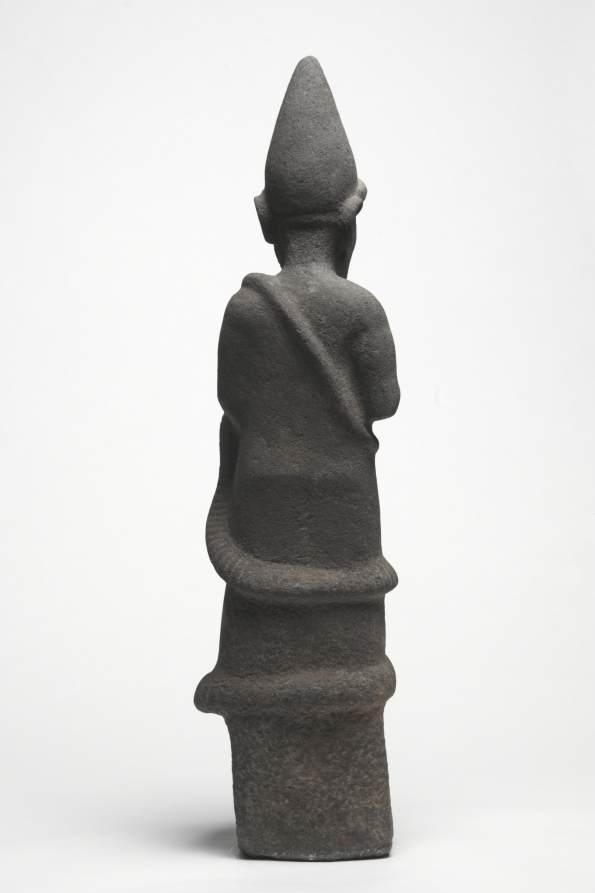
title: Priest-King or Deity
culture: Hittite, North Syria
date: c. 1600 BCE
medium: basalt with bone eyes (left, ancient; right, restored)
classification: Sculpture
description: The Hittites migrated into Anatolia in the 3rd millennium BCE and spoke an Indo-European language, a group that includes Greek, Latin, Persian, Sanskrit, English, and most modern European languages. They were the first ancient people to use iron for weapons. From about 1600–1200 BCE their empire was at its peak, extending from central Anatolia to Syria, and south along the eastern Mediterranean. Their vast empire and interest in commerce enabled the Hittites to spread Mesopotamian ideas and culture throughout the ancient Mediterranean world. This large basalt sculpture is exceptionally rare in depicting a Hittite god or priest-king wearing a horned conical crown, false beard, and long robe. He holds a bowl in his right hand and once held something in his left, perhaps a staff or sword.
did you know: The left eye of the sculpture is the original bone inlay while the right eye is a modern restoration done after the piece was damaged.